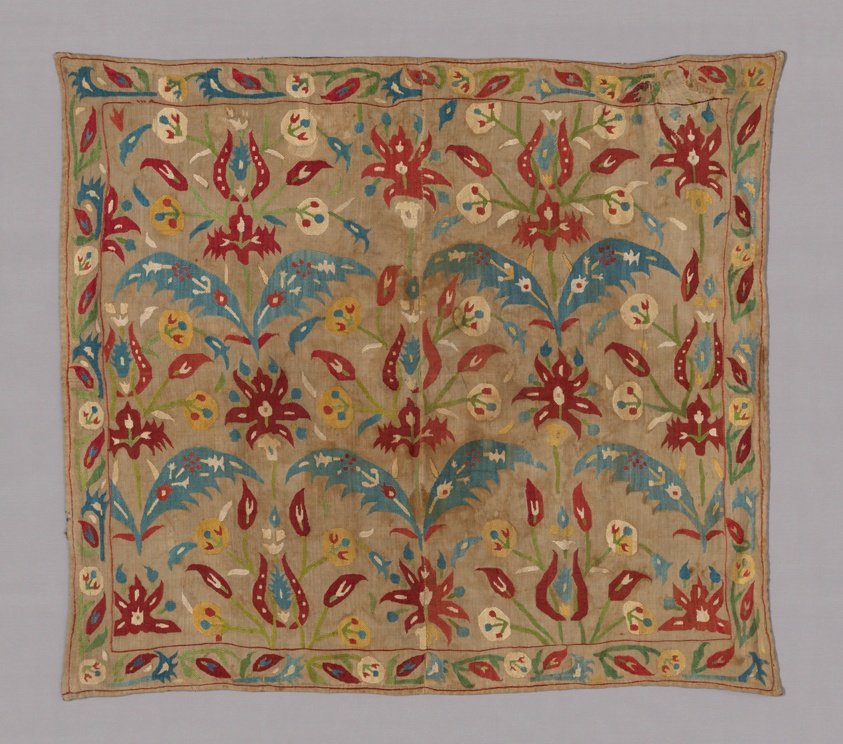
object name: Textile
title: Cover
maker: Turkey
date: 1675/1725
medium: linen, plain weave, embroidered in silk in polychrome in large scale floral motif (backed in cotton, plain weave; pieced in center).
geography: Turkey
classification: textile; needlework (visual works); weaving